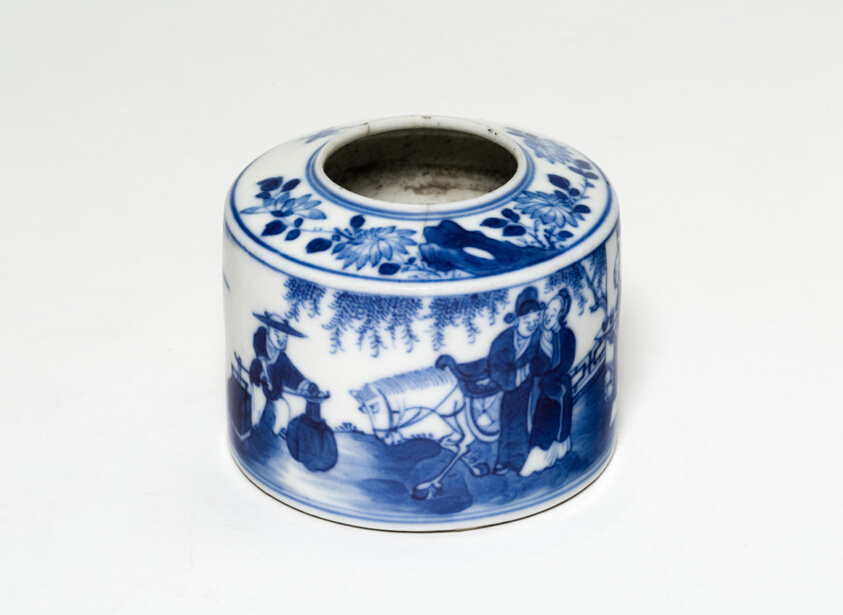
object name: Vessel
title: Cylindrical Water Jar with Figures in a Landscape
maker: China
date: Qing dynasty (1644–1911), Qianlong period (1736–1795)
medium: Stoneware painted in underglaze blue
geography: China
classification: stoneware; asian art; ceramics